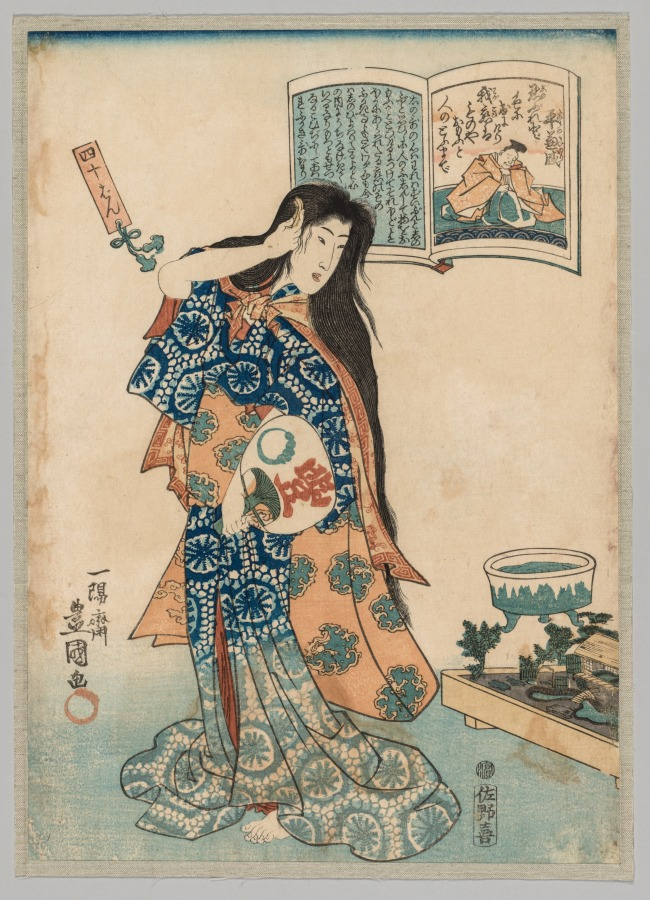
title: Woman with a Fan in her Left Hand Combing her Hair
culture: Japan, Edo period (1615–1868)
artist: Utagawa Kunisada (Japanese, 1786–1865)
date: 1786–1864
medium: color woodblock print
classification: Print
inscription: Signature: Ichiyosai Toyokuni